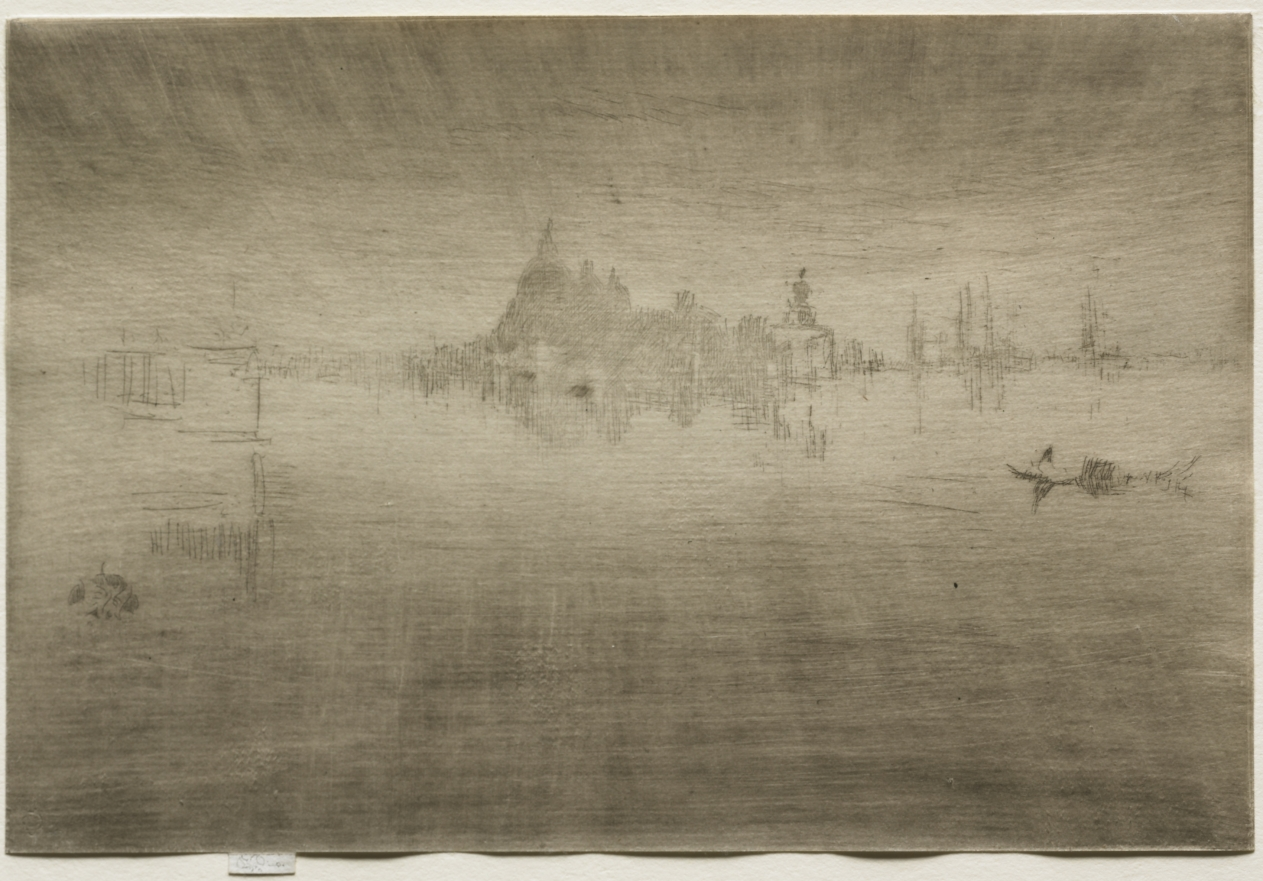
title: Nocturne: Salute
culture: America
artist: James McNeill Whistler (American, 1834–1903)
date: 1879–80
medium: etching and drypoint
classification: Print